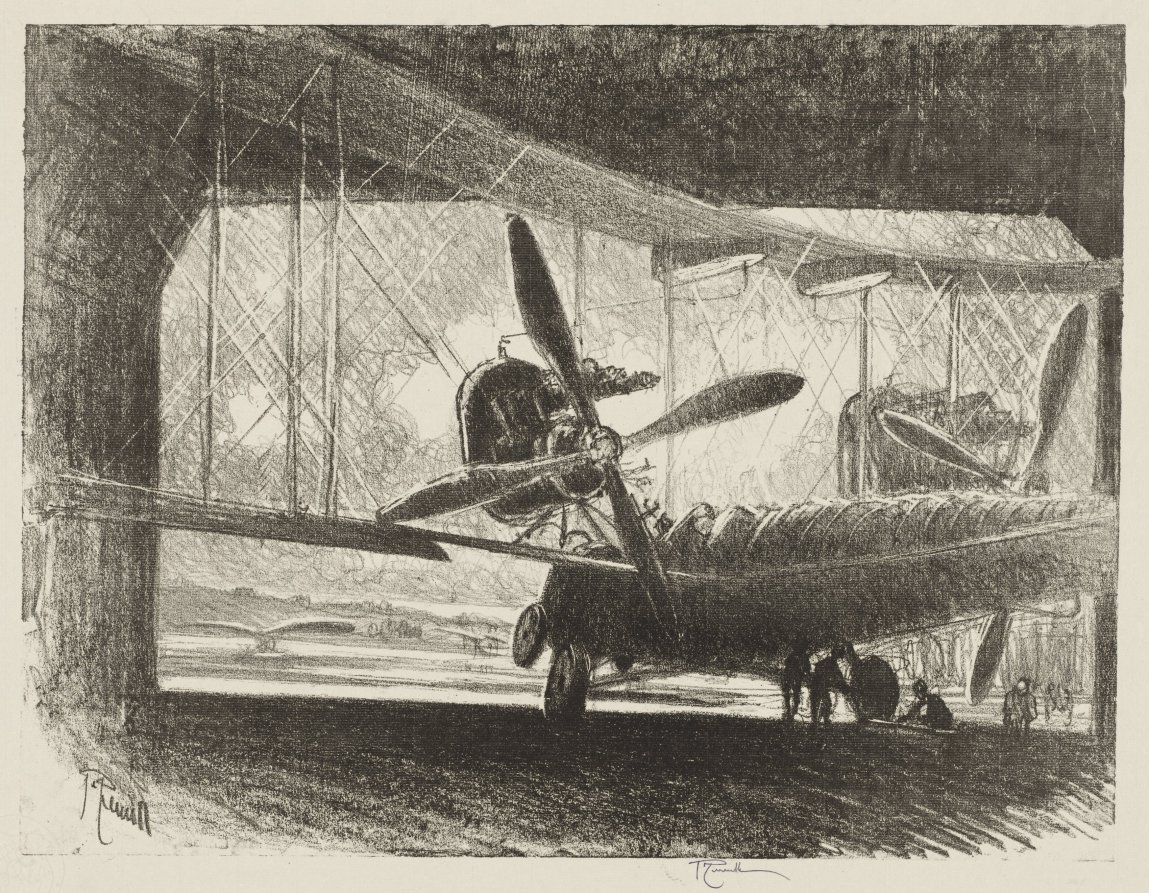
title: English War Work: The Big Bug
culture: America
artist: Joseph Pennell (American, 1857–1926)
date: 1916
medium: lithograph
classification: Print